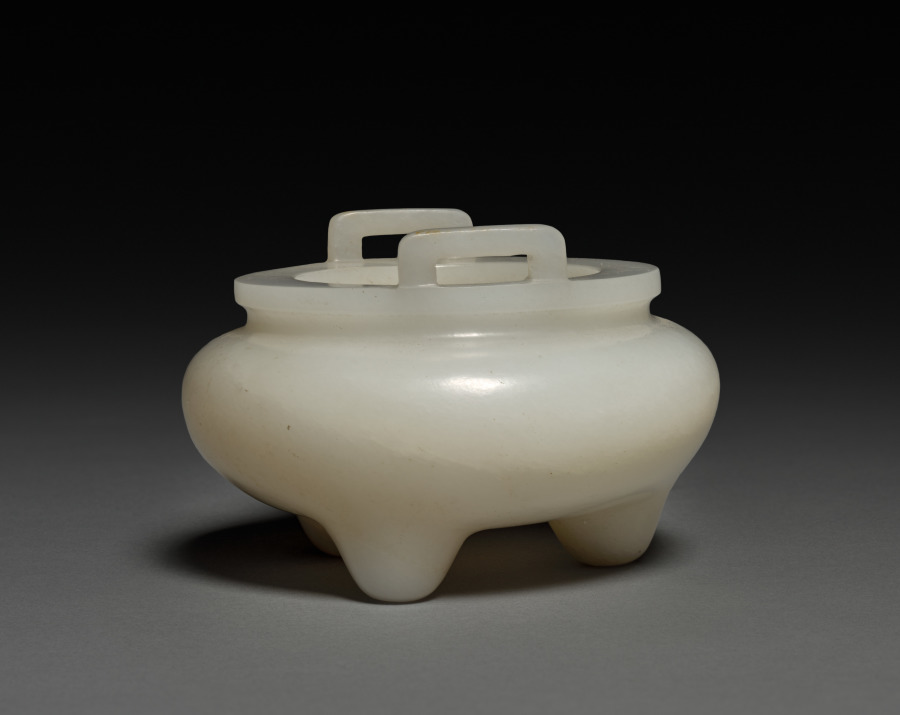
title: Tripod Incense Burner, Ding Shape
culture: China, Qing dynasty (1644-1911)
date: 1644–1911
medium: jade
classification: Jade